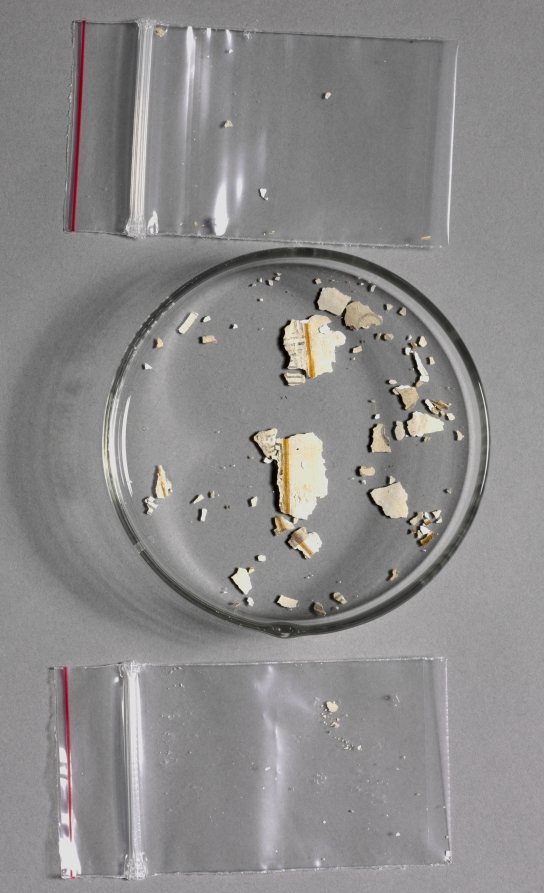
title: White-Ground Lekythos (Oil Vessel): Mourners at Tomb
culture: Greek, Attic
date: c. 400s BCE, with modern painting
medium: ceramic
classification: Ceramic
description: In its basic shape and decorative scheme—three figures before a stepped tomb marker—this lekythos resembles hundreds of funerary vessels made in Athens during the fifth century (400s) BC. But unusual features of the painted decoration, including the multicolored palmettes on the shoulder, and the shoes worn by the youth, suggest a modern intervention. Zinc found in analysis of the white ground is also likely modern, although the vessel itself may be ancient.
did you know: Both stylistic and technical studies suggest that this vase is not wholly ancient.